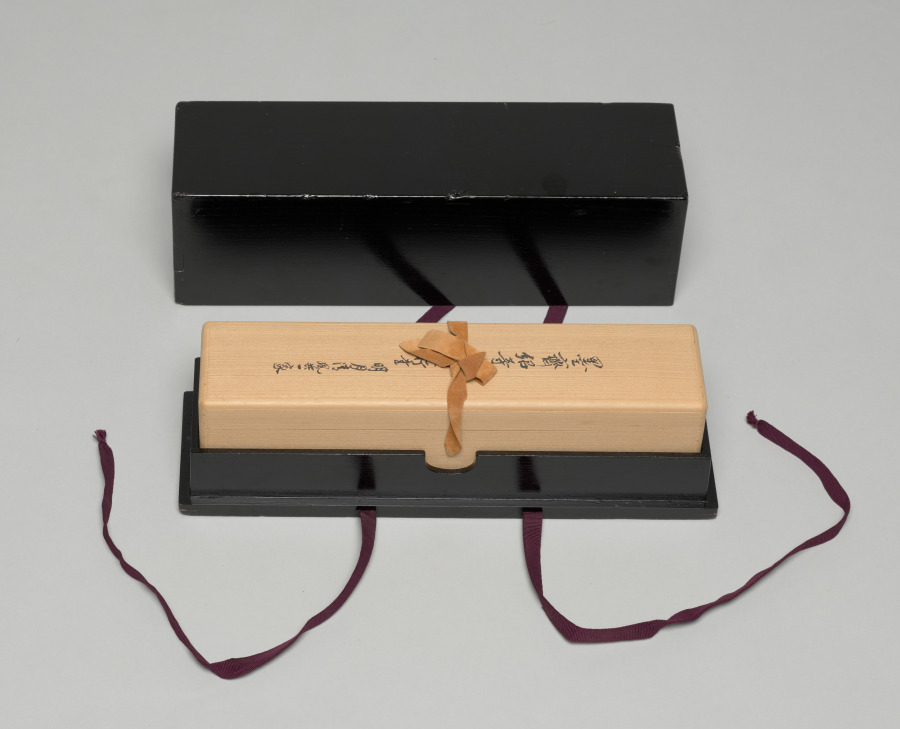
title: Single-column Calligraphy (Bright Moon and Fresh Breath as One . . . )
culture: Japan, Muromachi period (1392–1573)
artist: Motsurin Jōtō (Japanese, d. 1492)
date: 1400s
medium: hanging scroll; ink on paper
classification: Calligraphy